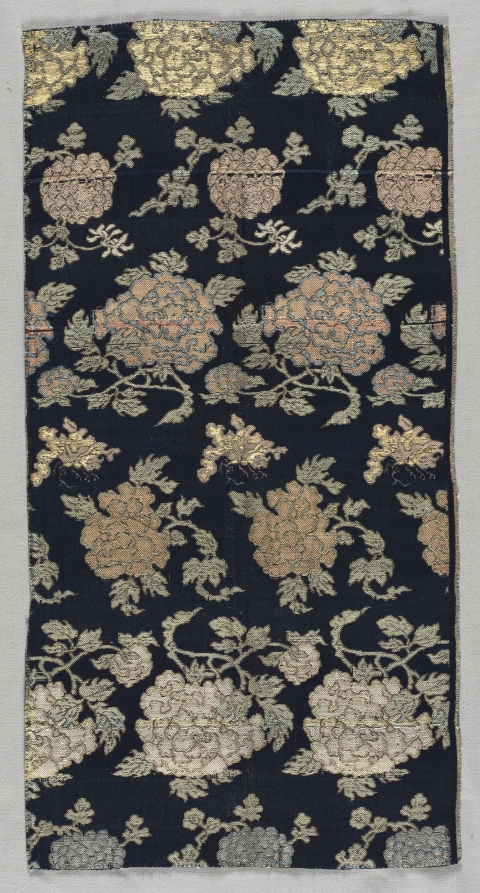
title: Textile Fragment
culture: Japan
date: 1800s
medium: silk, metallic thread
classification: Textile